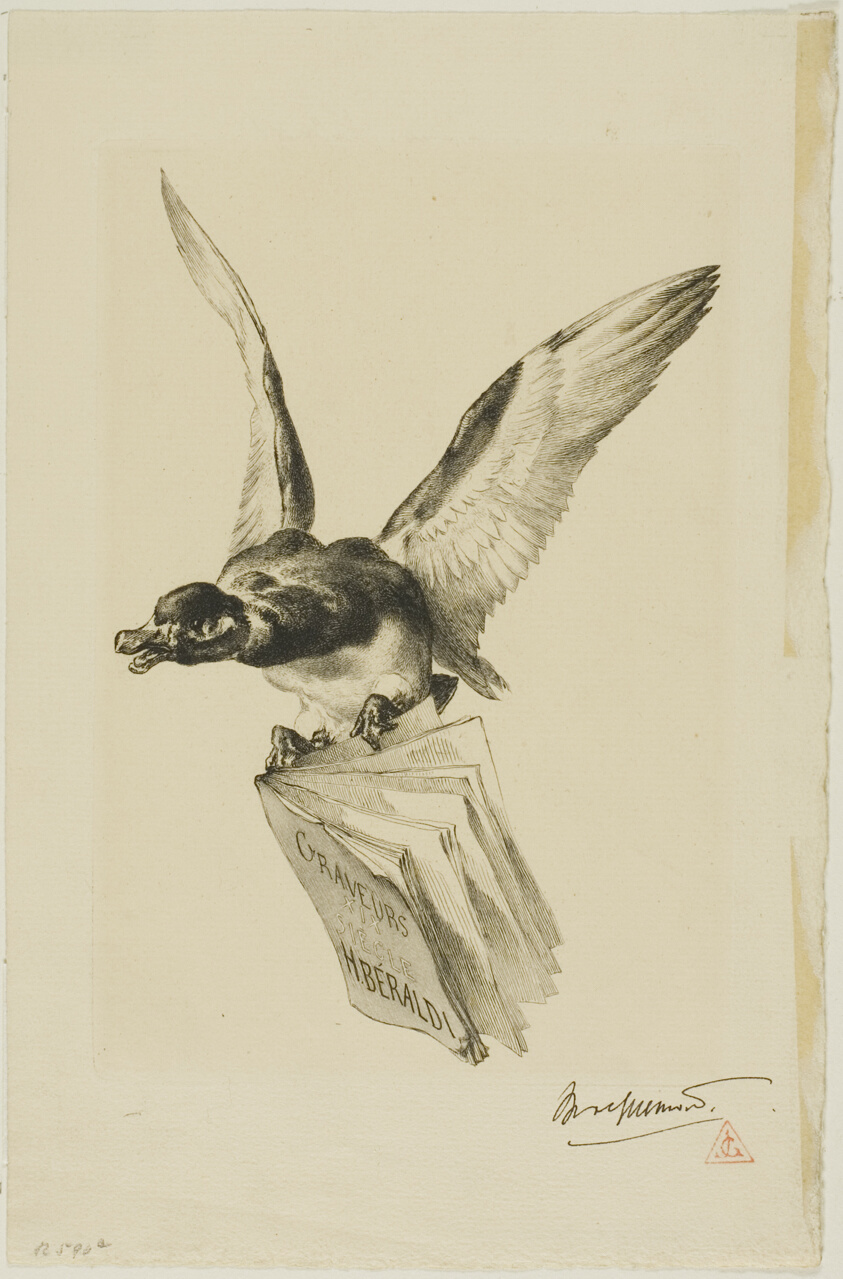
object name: Print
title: Frontispiece for Engravers of the 19th Century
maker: Felix Bracquemond; French, 1833–1914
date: 1886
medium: Etching on cream laid paper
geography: France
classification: etching; print; prints and drawing